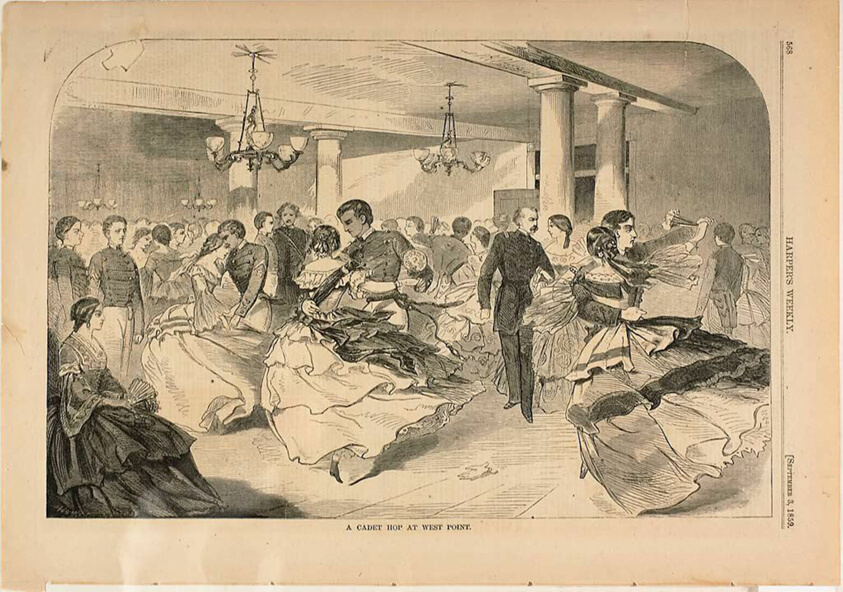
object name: Print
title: A Cadet Hop at West Point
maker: Winslow Homer (American, 1836-1910); published by Harper's Weekly (American, 1857-1916)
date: published September 3, 1859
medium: Wood engraving on paper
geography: United States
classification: wood engraving; print; prints and drawing